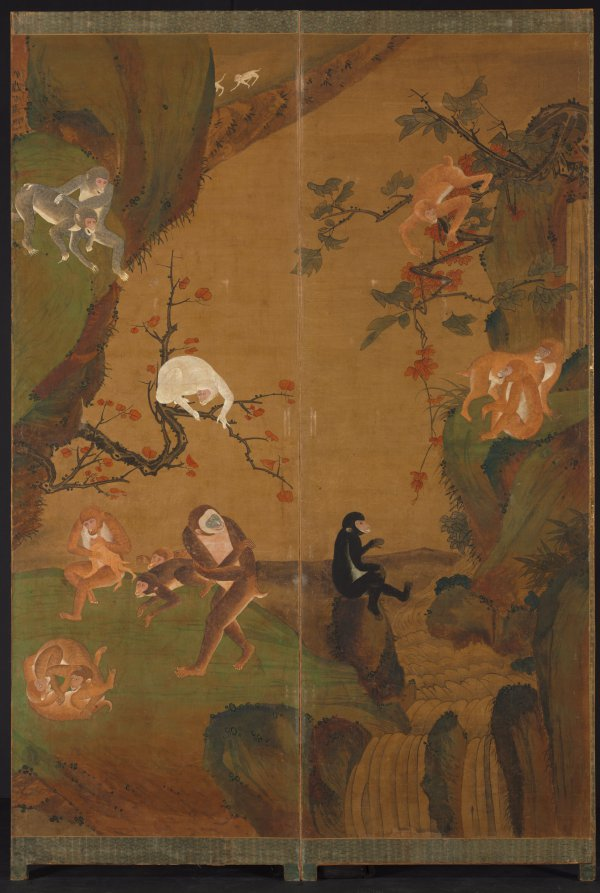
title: Gibbons in a Landscape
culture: Korea, Joseon dynasty (1392–1910)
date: early 1900s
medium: Six-panel folding screen; ink and color on hemp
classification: Painting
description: In this folding screen, gibbons playfully interact with each other. In Korean paintings, gibbons were less frequently depicted than in their Chinese and Japanese counterparts. However, they became popular toward the end of the 1800s, possibly due to an influx of Chinese and Japanese decorative arts. Gibbons symbolize good fortune, but as paired with the red autumn foliage, specifically refer to professional success, such as passing the government examination and getting promoted to a higher position. The large ripe peach held by one gibbon bears another symbolic meaning: prosperity and longevity.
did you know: Gibbons were often presented to the Joseon royal court as diplomatic gifts from the Japanese government.